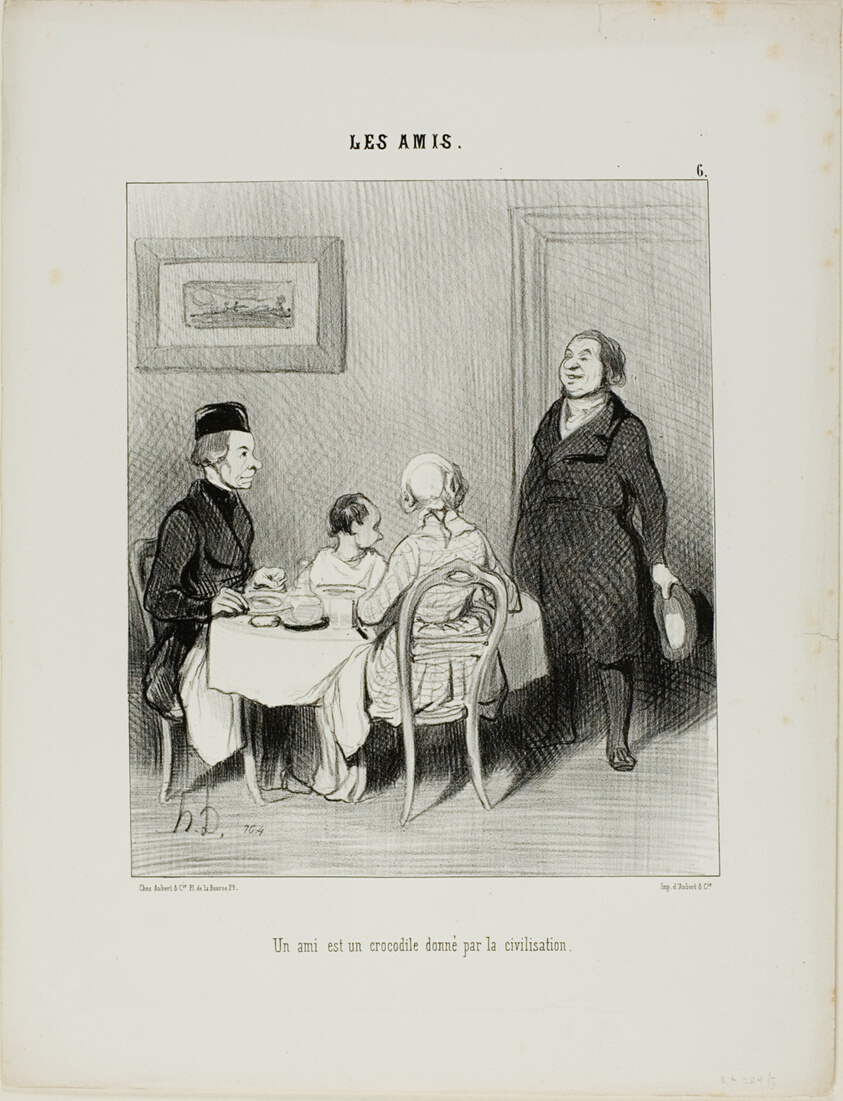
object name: Print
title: A friend is a crocodile produced by civilization, plate 6 from Les Amis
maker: Honoré Victorin Daumier; French, 1808-1879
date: 1845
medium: Lithograph in black on white wove paper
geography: France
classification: lithograph; print; prints and drawing